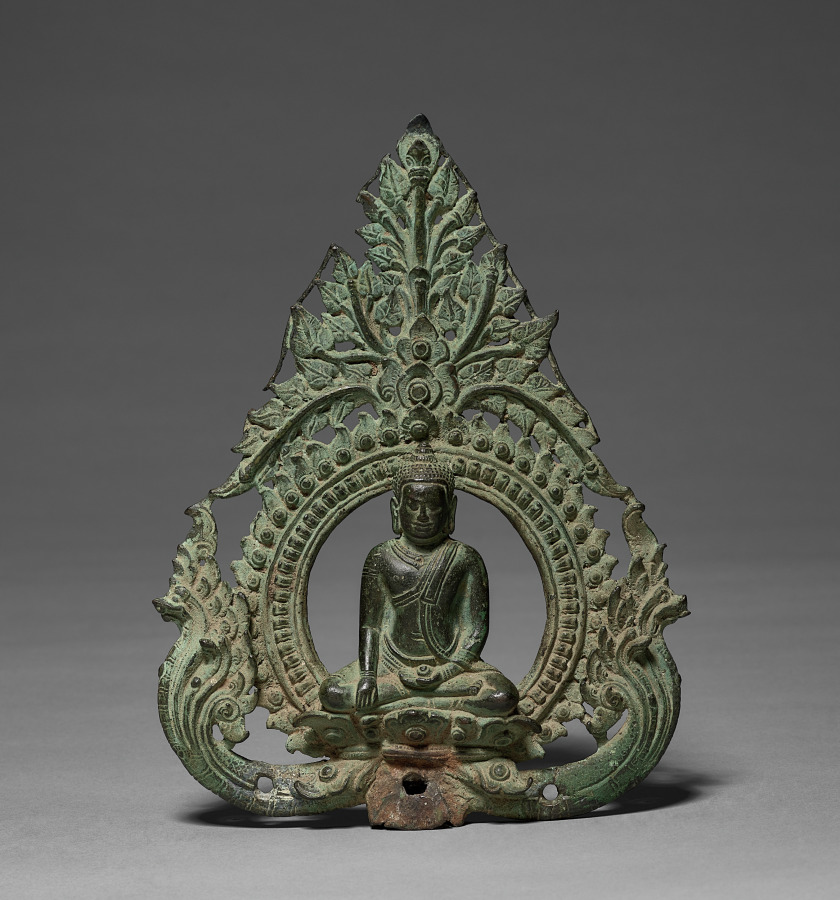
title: Finial with the temptation of Buddha by Mara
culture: Cambodia, reign of Jayavarman 7th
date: late 1100s–early 1200s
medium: bronze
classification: Sculpture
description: The Buddha sits surrounded by a circle of flaming jewels and full-blown lotus petals. Two rearing serpents emblematic of the glory of the Khmer Empire emerge from either side of his lotus pedestal. The Buddha’s right hand points down in the earth-touching gesture, and his left hand holds a round object, probably a special rice offering that indicates the Buddha’s power to ensure ongoing prosperity of the land. The branches of the pipal tree under which the Buddha reached enlightenment top the composition. Beneath his lotus pedestal, the earth goddess wrings the waters from her hair that wash away the army of Mara, the grimacing demons holding clubs and shields who flee to either side.